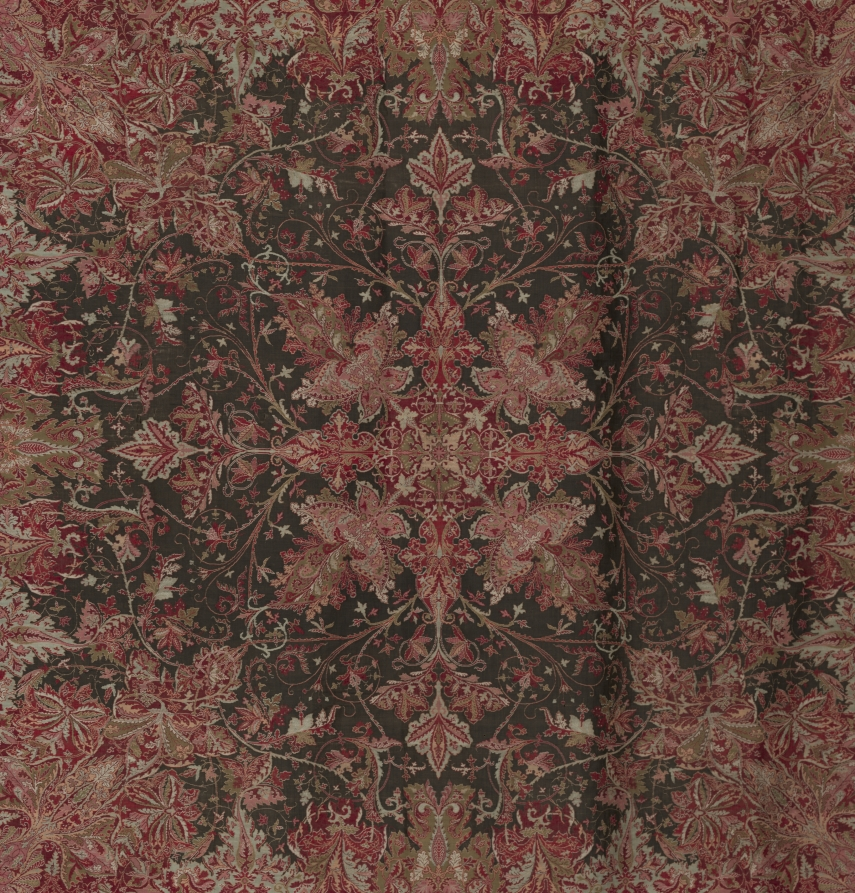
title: Square Shawl with Quarter Shawl Layout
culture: Austria, England, France, or Scotland, 19th century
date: 1840s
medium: supplementary weft pattern; silk & wool?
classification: Textile